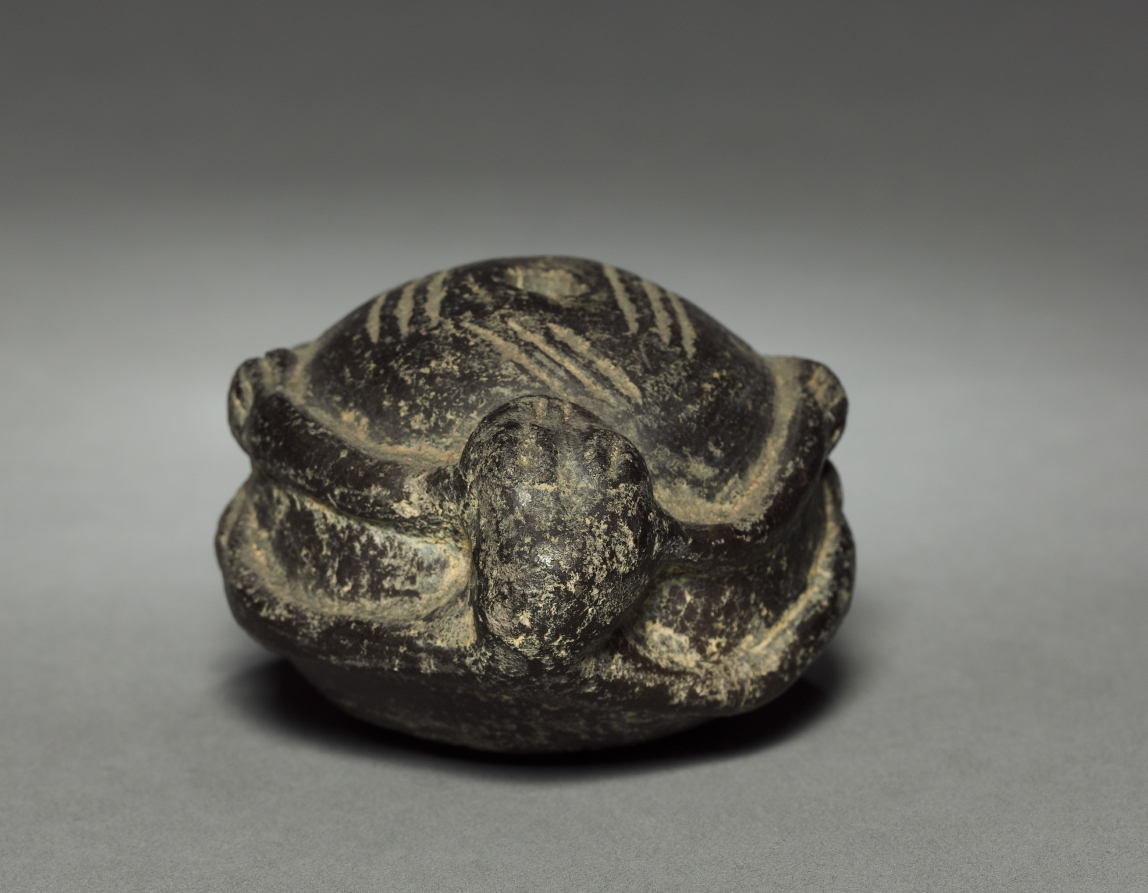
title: Jar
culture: Colombia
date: before 1921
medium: pottery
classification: Ceramic